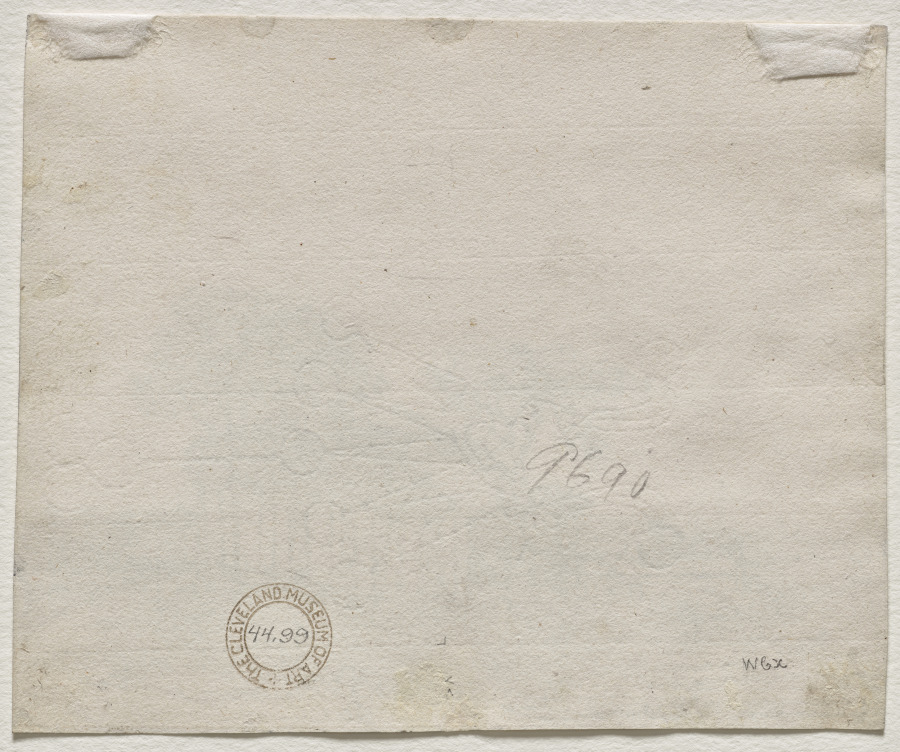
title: Cottage with a White Paling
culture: Netherlands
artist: Rembrandt van Rijn (Dutch, 1606–1669)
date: 1648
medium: etching and drypoint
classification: Print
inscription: lower left, in plate: Rembrandt f / 1648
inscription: upper left, in pen and brown ink: 6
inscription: lower right, in graphite (erased): 274 / [illegible]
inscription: verso, upper center, in graphite: 224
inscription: verso, lower right, in graphite: 9690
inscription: verso, lower right, in graphite: WCX